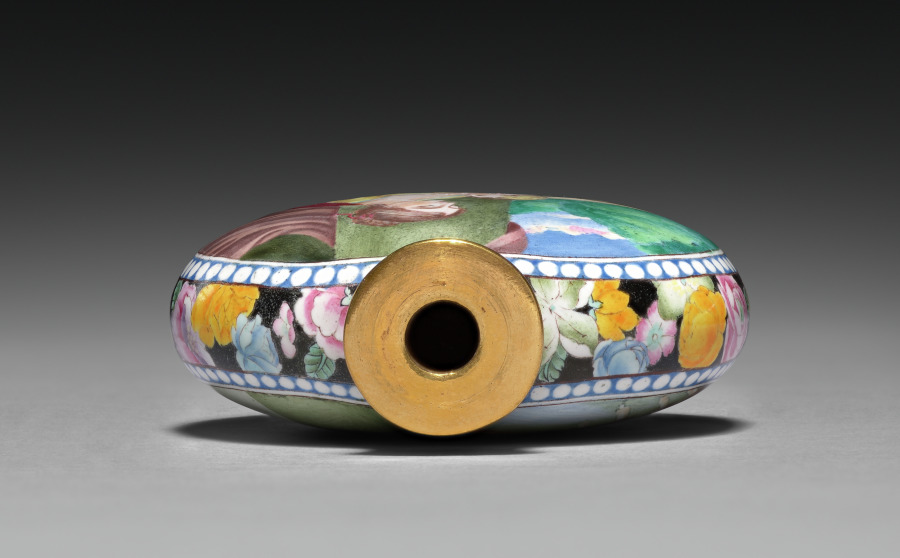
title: Snuff Bottle with European Figures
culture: China, Qing dynasty (1644-1911), Qianlong mark and reign (1736-95)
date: 1736–95 or later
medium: painted enamel on copper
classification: Enamel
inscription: 乾隆年製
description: Snuff bottles were introduced from Europe to China around the 1700s to hold portable snuff or medicine.